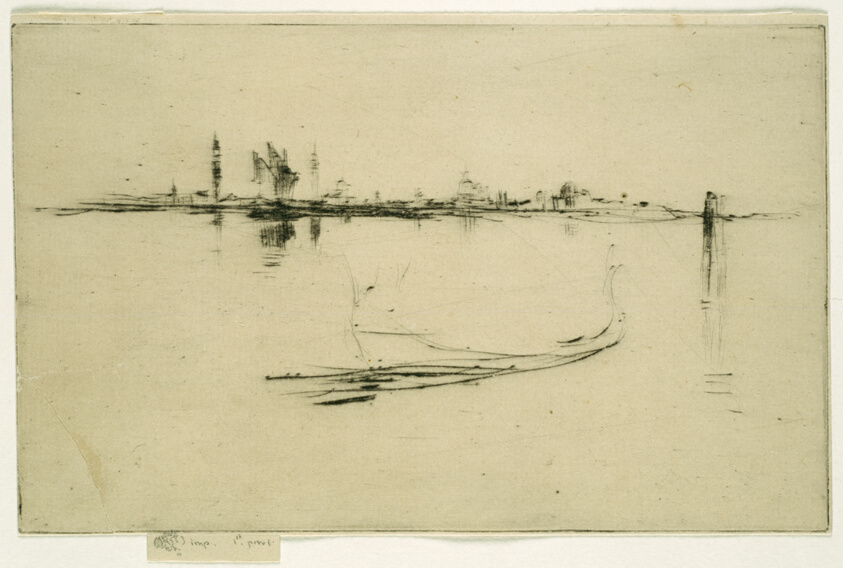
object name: Print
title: Islands: Evening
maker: James McNeill Whistler (American, 1834-1903)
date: 1879/80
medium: Drypoint in black ink on cream laid paper laid down on cream wove paper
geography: United States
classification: drypoint; print; prints and drawing; paper